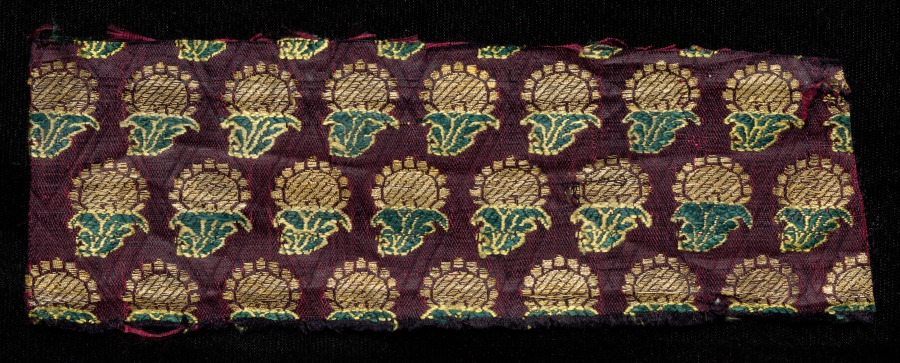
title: Fragment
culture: India, 19th century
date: 1800s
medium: brocade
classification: Textile